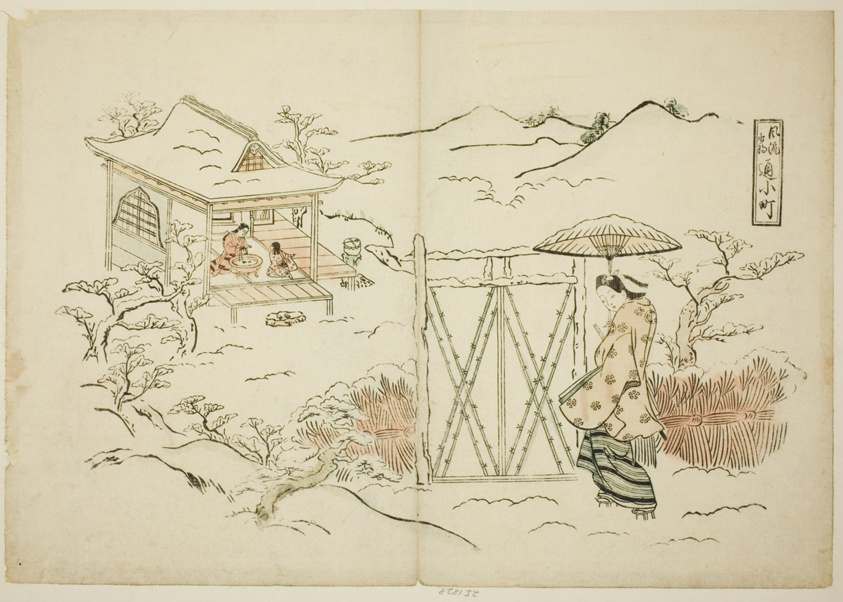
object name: Print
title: A Modern Version of Shosho visiting Komachi (Furyu Shosho kayoi Komachi)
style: Japanese (culture or style)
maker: Okumura Masanobu (Japanese, 1686-1764)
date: c. 1715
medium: Hand-colored woodblock print; oban, sumizuri-e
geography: Japan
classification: woodblock print; print; asian art